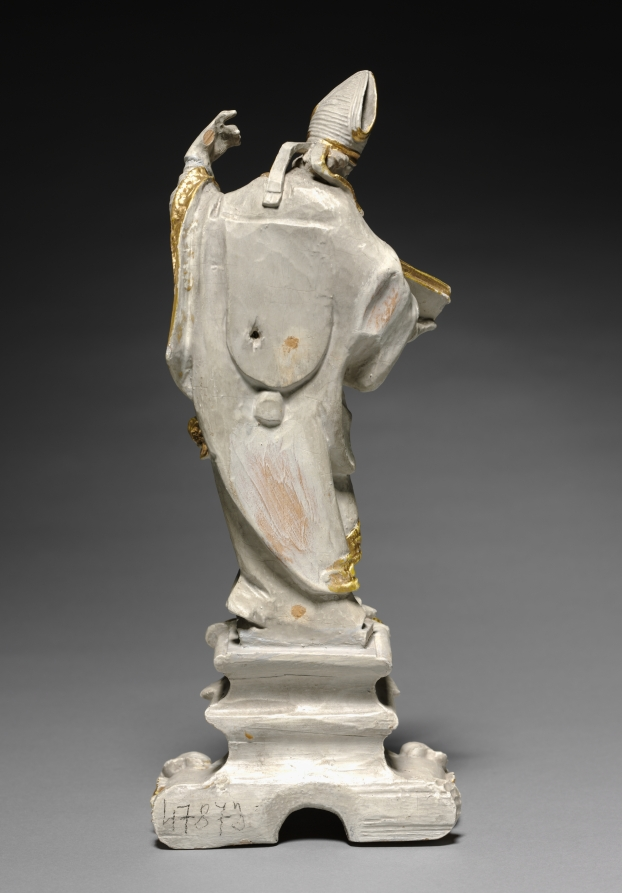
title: Bishop Saint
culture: Germany, 18th century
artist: attributed to Ferdinand Tietz (Austrian, 1708–1777)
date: c. 1740–1750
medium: painted and gilded wood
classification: Sculpture